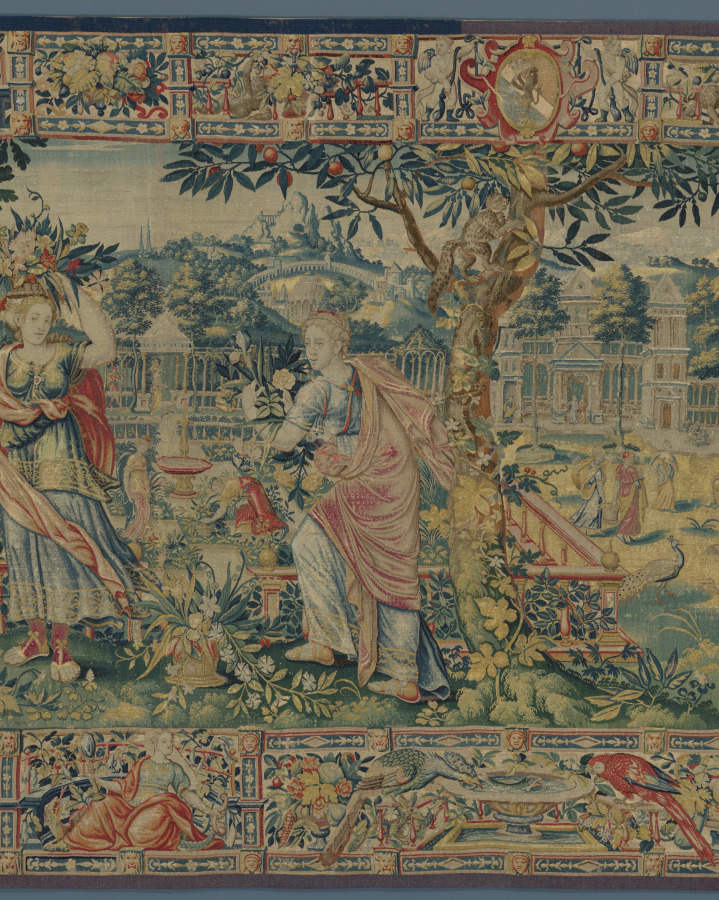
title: Romans Admiring the Sabine Women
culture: Belgium, Brussels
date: 1570–90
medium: silk and wool: tapestry weave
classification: Tapestry